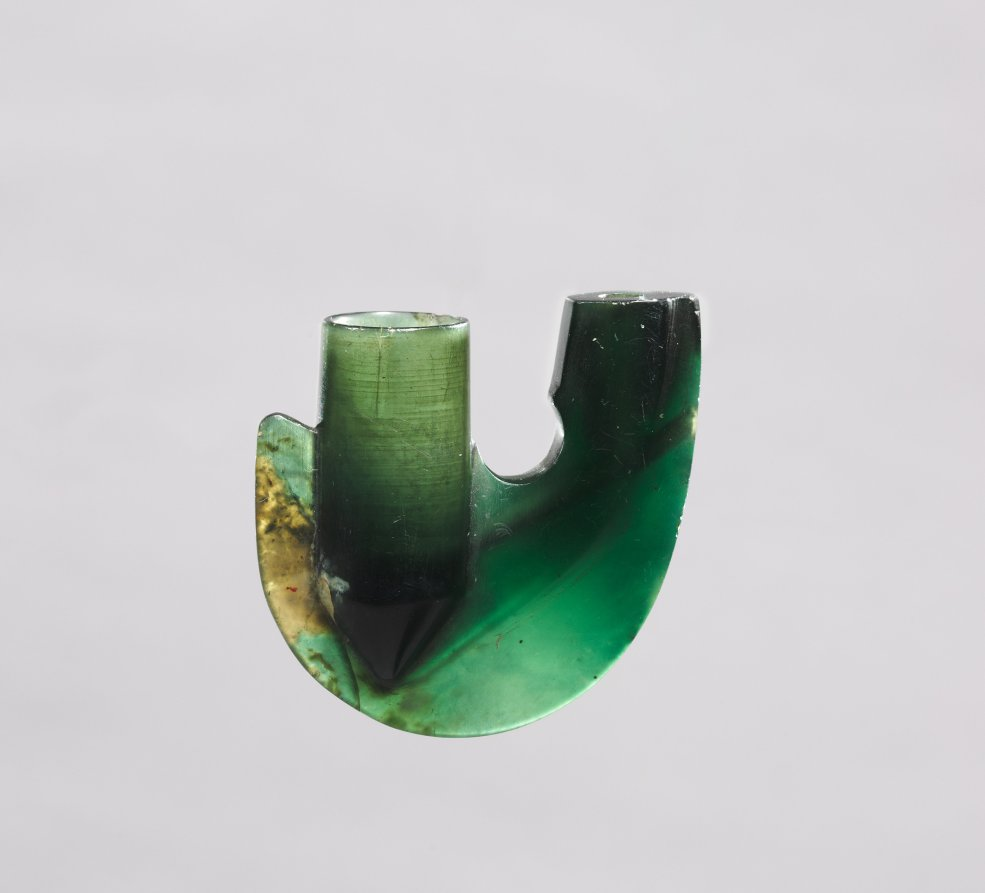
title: Pipe Bowl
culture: Africa, Southern Africa, South Africa, Southern Nguni-style maker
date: possibly 1800s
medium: Nephrite and metal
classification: Implements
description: Carved from a deep green, translucent stone with a highly polished surface, this exquisite example of an extremely rare type of pipe bowl originates from the Eastern Cape Province in South Africa. Like the few other known examples, this pipe bowl would have been complemented by a stem, now lost, made from wood or reed or another less durable material. It is believed that such nephrite pipe bowls were copied from stone examples introduced by 17th-century Dutch settlers in the Cape region. In southern Africa, smoking tobacco and taking snuff were and still are enjoyed as activities that establish or solidify harmonious social relationships. In addition to their practical function as smoking devices, pipes of unusual and therefore costly materials and in fancy and refined shapes and forms, like this example, served as markers of rank and status and indicated prestige and socioeconomic prominence.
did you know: This object is made of nephrite, one of two different mineral species called jade; the other is jadeite.